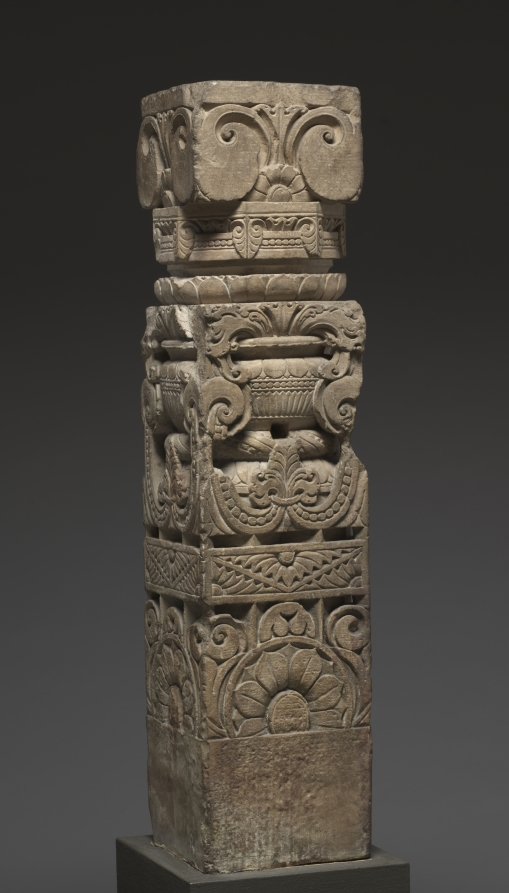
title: Monolithic Pillar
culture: Northern India, Mathura, early medieval period, 7th-8th century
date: 600s–700s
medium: red sandstone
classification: Sculpture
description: The central motif of this temple pillar is a pot, out of which vegetal forms exuberantly emerge, indicating bounty and abundance. The pot itself is decorated with lotus petals, leaves, and a band of pearls. The overflowing pot is a pervasive symbol in India to reference the prosperity and productivity that will result from worship and prayers at the holy site. It also symbolizes the auspiciousness and beauty of the created world.